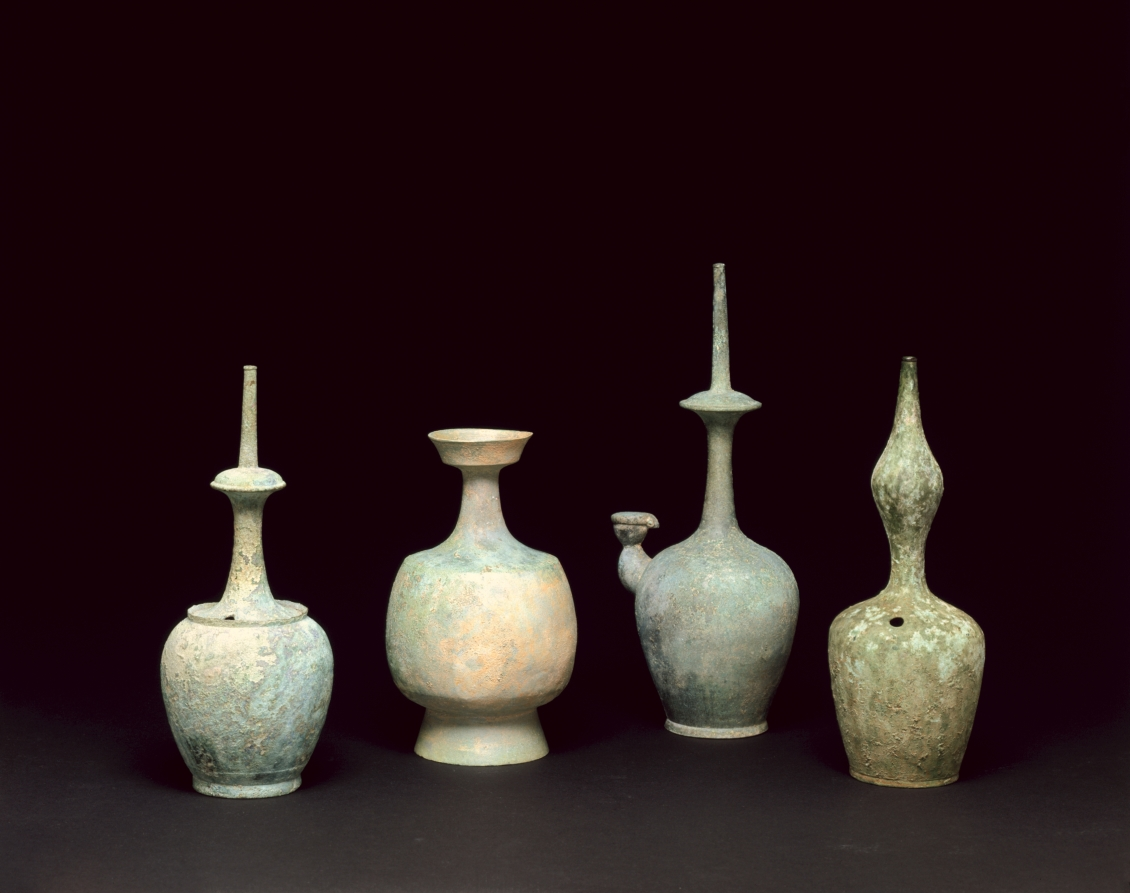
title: Wide-Mouthed Bottle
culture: Korea, Goryeo dynasty (918–1392)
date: 1100s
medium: bronze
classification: Metalwork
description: As early as the seventh century, the practice of drinking tea and wine became an important part of elite culture in Korea. Elites of the Goryeo period commissioned a variety of types of utensils and vessels made in both ceramic and bronze, including this handsome bronze wine bottle to make their drinking experience more exciting.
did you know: A bottle with a wide opening is one of the popular types for both bronze and celadon wares. Its ceramic counterpart is 1918.435.